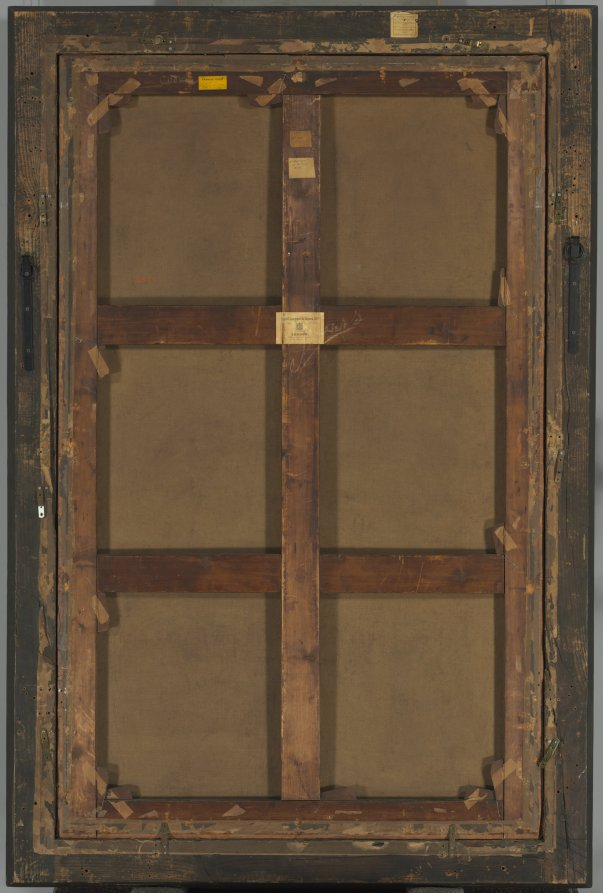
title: Portrait of the Jester Calabazas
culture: Spain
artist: Diego Velázquez (Spanish, 1599–1660)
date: c. 1631–32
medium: oil on canvas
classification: Painting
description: Calabazas, a jester in the court of King Philip IV of Spain, had physical and mental disabilities, a state that the artist emphasizes, rather than tries to hide. While the Spanish court prized and doted upon people with disabilities such as Calabazas, Velázquez transformed their depiction in portraiture. This startling work uses the format of the formal, full-length court portrait to present a type of person who was generally perceived as marginal at this point in history and profoundly humanizes him.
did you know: Calabazas holds a wind-driven pinwheel and a miniature portrait of a woman, together suggesting the inconstancy of love.